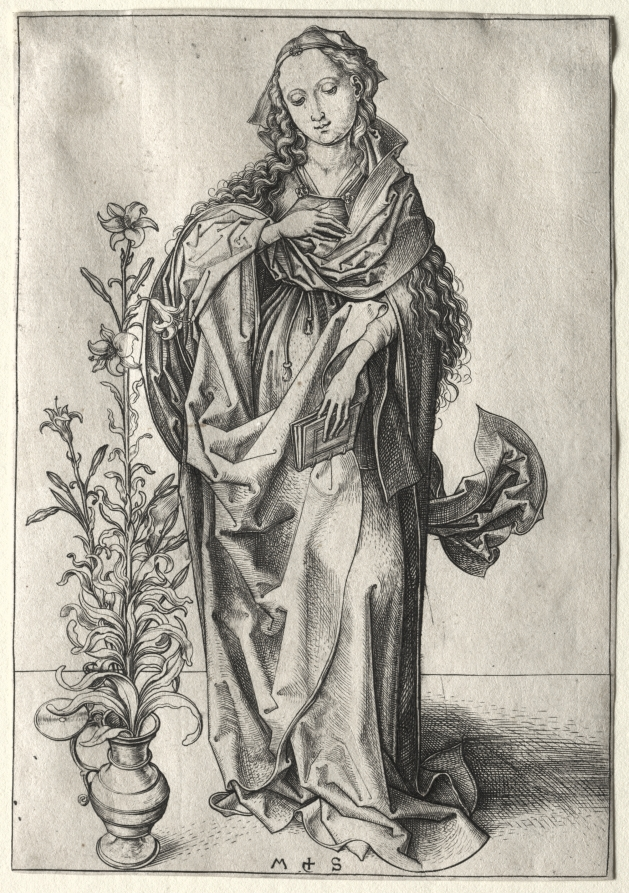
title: The Virgin of the Annunciation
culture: Germany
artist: Martin Schongauer (German, c. 1450–1491)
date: 1470–80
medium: engraving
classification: Print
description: This engraving is half of a two-print scene depicting the Annunciation to the Virgin, when the angel Gabriel told Mary she would miraculously give birth to the Son of God. Presumably buyers could purchase the prints separately, although Schongauer probably hoped people would want to collect them both. His engraved lines masterfully emulate different natural qualities and textures, for example the spiraling locks of hair and the lily, a symbol of Mary’s purity.